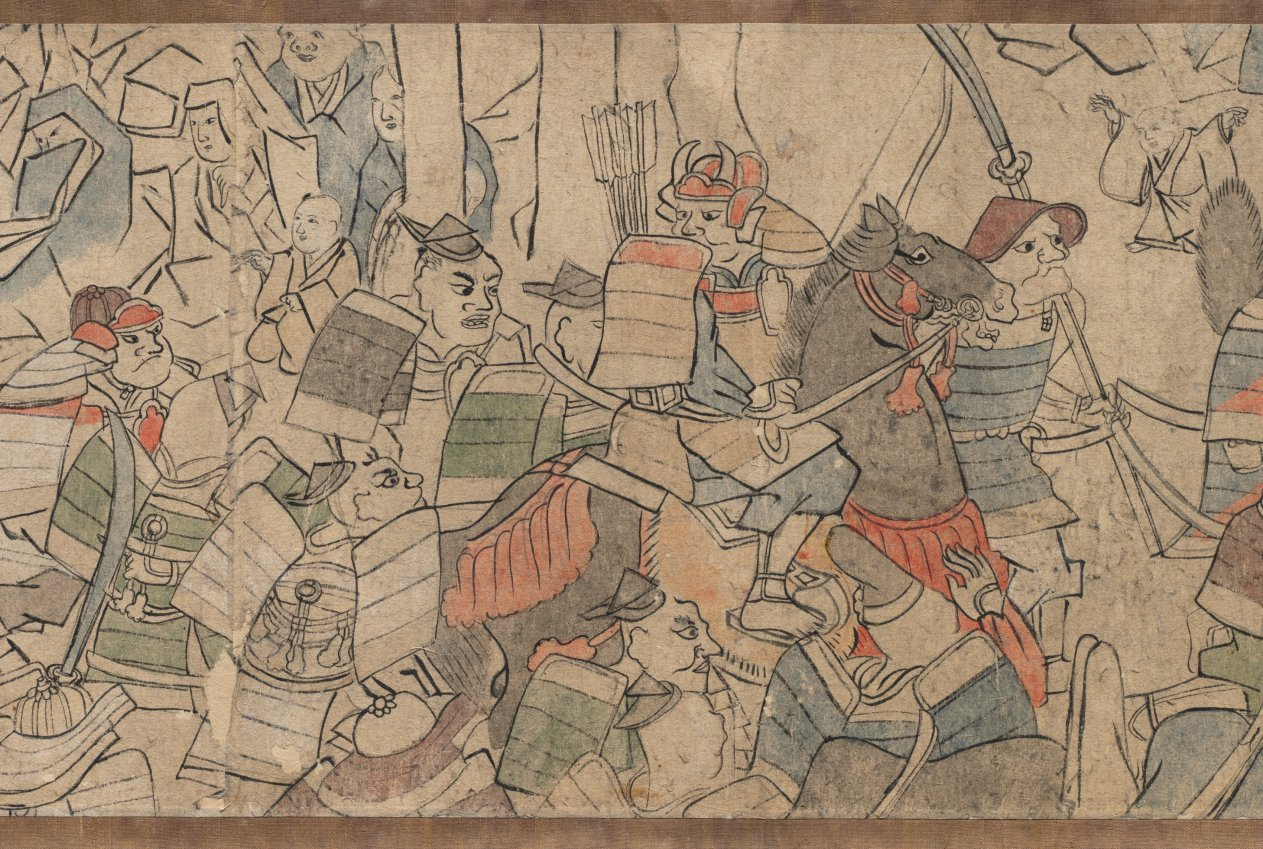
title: Oeyama Engi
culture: Japan, Edo period (1615–1868)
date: 1615–1868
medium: one of a pair of handscrolls; ink and color on paper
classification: Painting